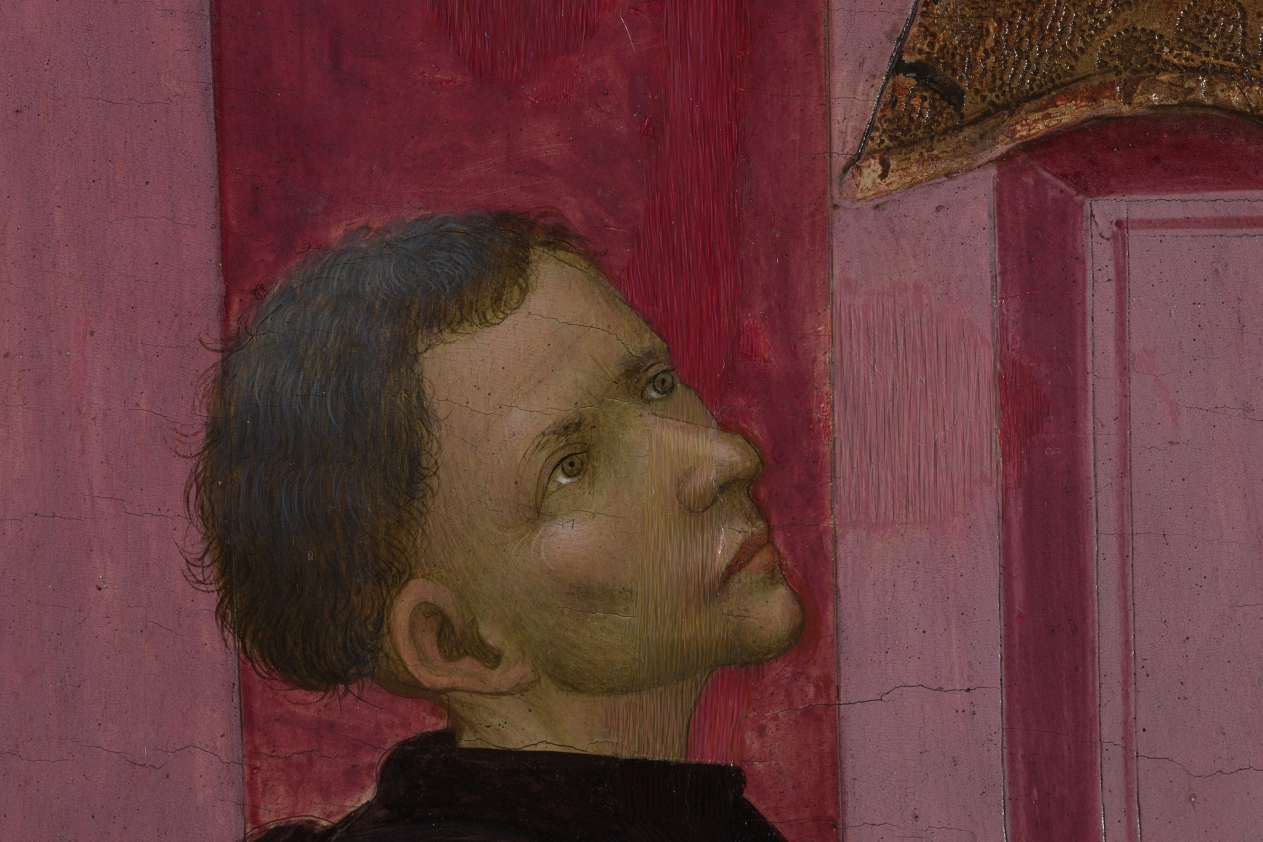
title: A Bishop Saint with a Donor (Saint Louis of Toulouse?)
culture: Spain, Catalonia, early 15th century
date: early 1400s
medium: tempera with raised and gilded gesso on wood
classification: Painting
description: The style of this painting suggests that it comes from Catalonia in northeastern Spain, though the identity of its artist remains unknown. The painting represents a youthful bishop-saint identifiable by a bishop’s symbols of authority, his miter and crozier. He wears rich vestments. Below, the figure in black represents the donor of the painting—likely a wealthy layperson rather than a cleric. The identity of the saintly bishop is speculated to be Saint Louis, Bishop of Toulouse, on the basis of his youth. Louis was consecrated Bishop of Toulouse in 1297, died six months later at the age of 23, and was canonized in 1317. His relics were moved in 1423 to Valencia and his cult flourished in Spain.